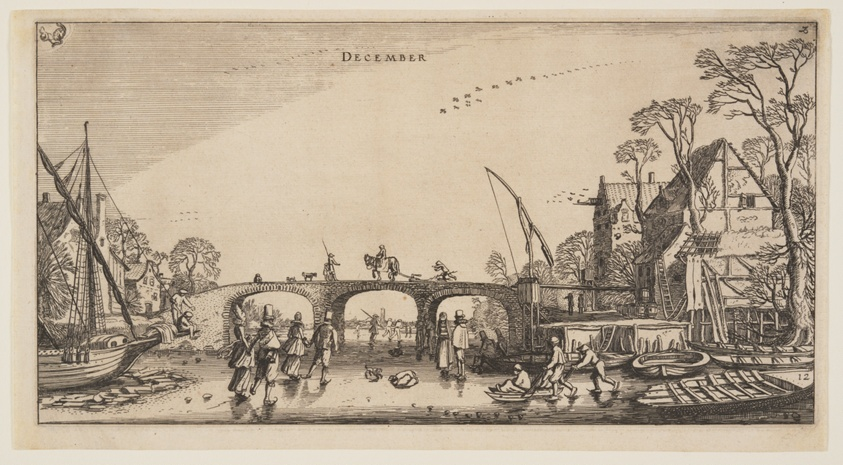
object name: Print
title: December, from The Twelve Months of the Year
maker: Jan van de Velde II (Dutch, c. 1593–1641); after Willem Buytewech (Dutch, c. 1591–1624)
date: 1616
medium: Etching on ivory laid paper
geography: Netherlands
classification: etching; paper; print; prints and drawing